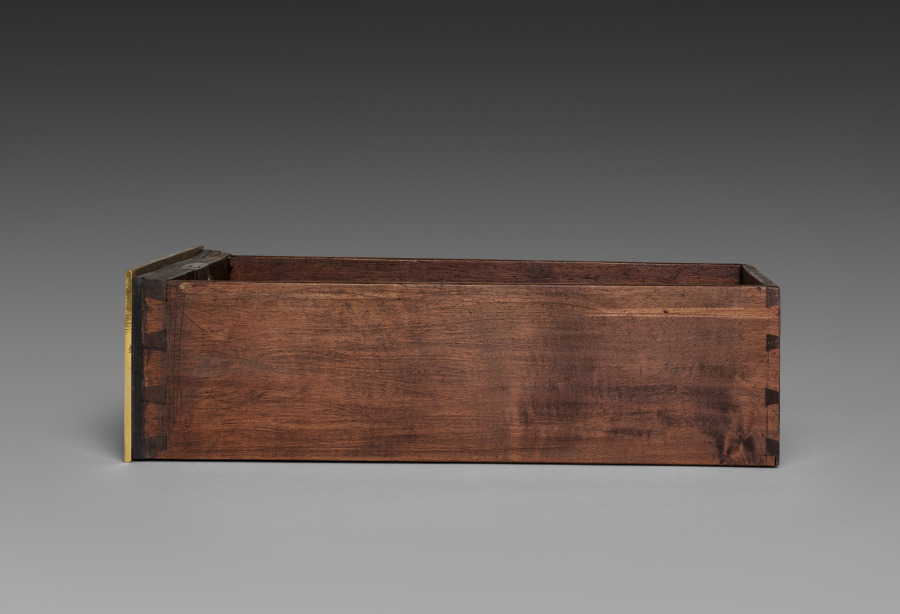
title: Side Drawer for Cabinet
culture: France, late 17th Century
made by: André-Charles Boulle (French, 1642–1732)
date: c. 1690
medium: ebony, marquetry in metal and tortoise shell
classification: Furniture and woodwork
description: Appointed cabinetmaker to King Louis XIV in 1672, André-Charles Boulle became a master of furniture making in France during the late 1600s until his death in 1732. Known primarily for his use of marquetry, in which metal patterns are inlaid into tortoiseshell then applied within the veneered surface of the furniture, Boulle established a level of quality and craftsmanship few others could achieve. As a result, his work found favor at the royal court and among other aristocrats and diplomats eager to impress the king. The inclusion of a medallion depicting Louis XIV within the bronze decoration of this chest would have identified the owner with the royal court. Often exhibiting stout architectural proportions with elegant groups of inlaid motifs such as the parrot on the central panel of this chest, Boulle’s designs are an example of the intellectual fashion for contrasting ideas, materials, and motifs.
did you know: Originally designed to sit atop an elaborate tall stand, this chest was likely altered in the late 1700s to reduce its scale and height.